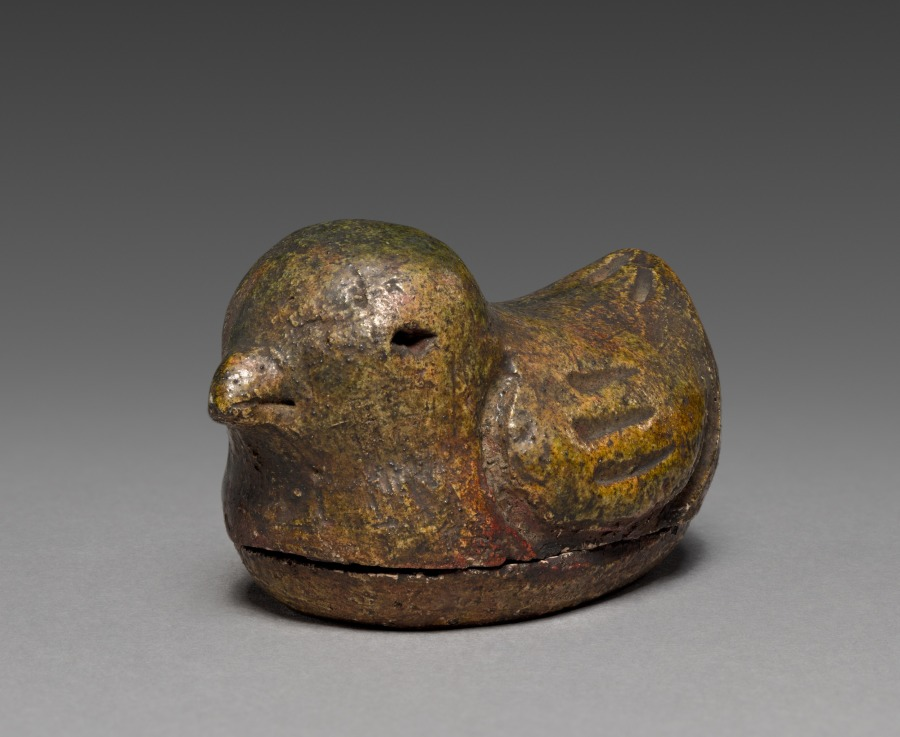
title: Incense Container (Kōgō) in the Shape of a Bird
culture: Japan, Edo period (1615–1868)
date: c. 1700–1868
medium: Stoneware with glaze and carved decoration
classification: Ceramic